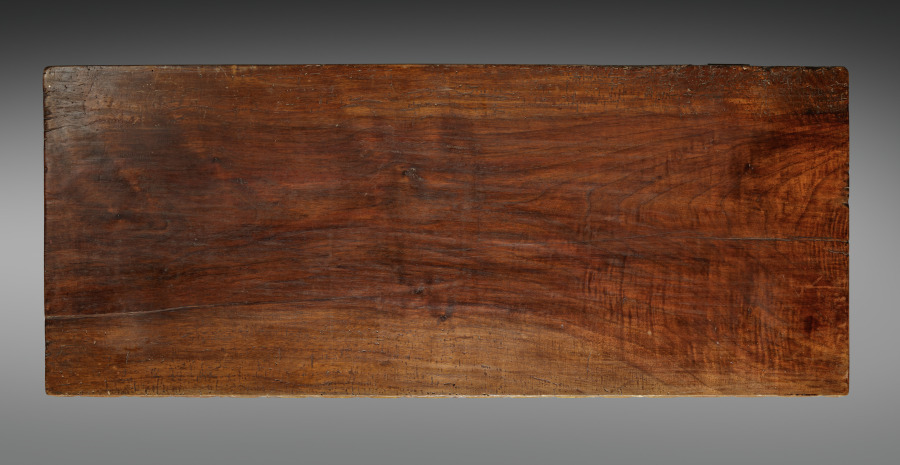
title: Chest (Base)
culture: Spain, Colonial, late 17th Century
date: late 1600s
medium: turned and joined wood with wrought iron hardware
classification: Furniture and woodwork